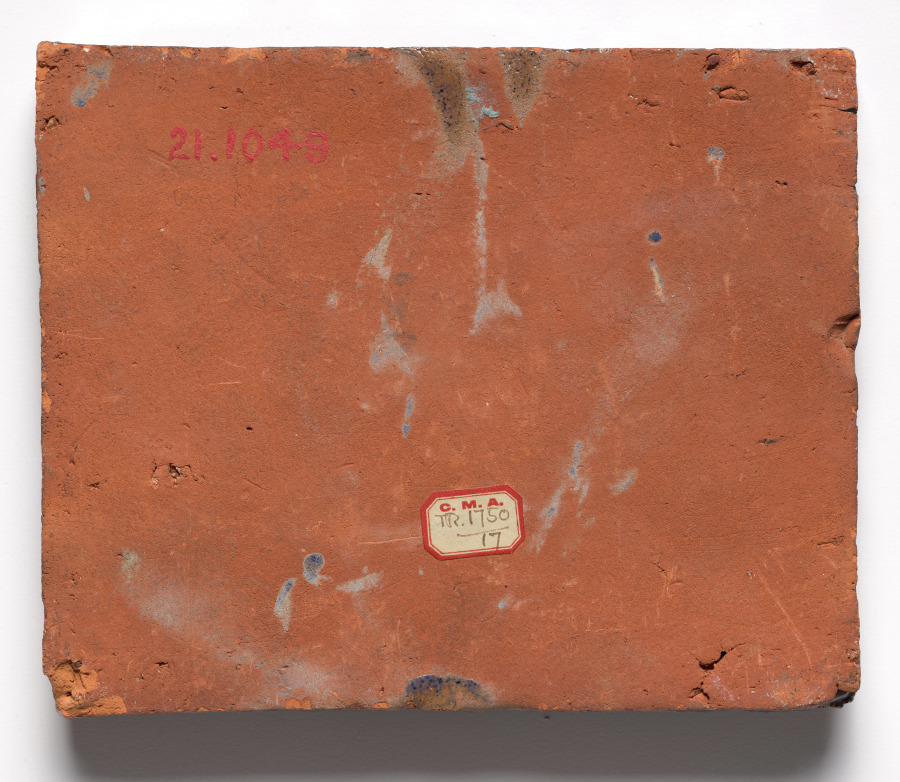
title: Tile- Ox of St. Luke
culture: America, Pennsylvania, Doylestown, Early 20th century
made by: Moravian Pottery and Tile Works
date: before 1921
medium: glazed ceramic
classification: Ceramic